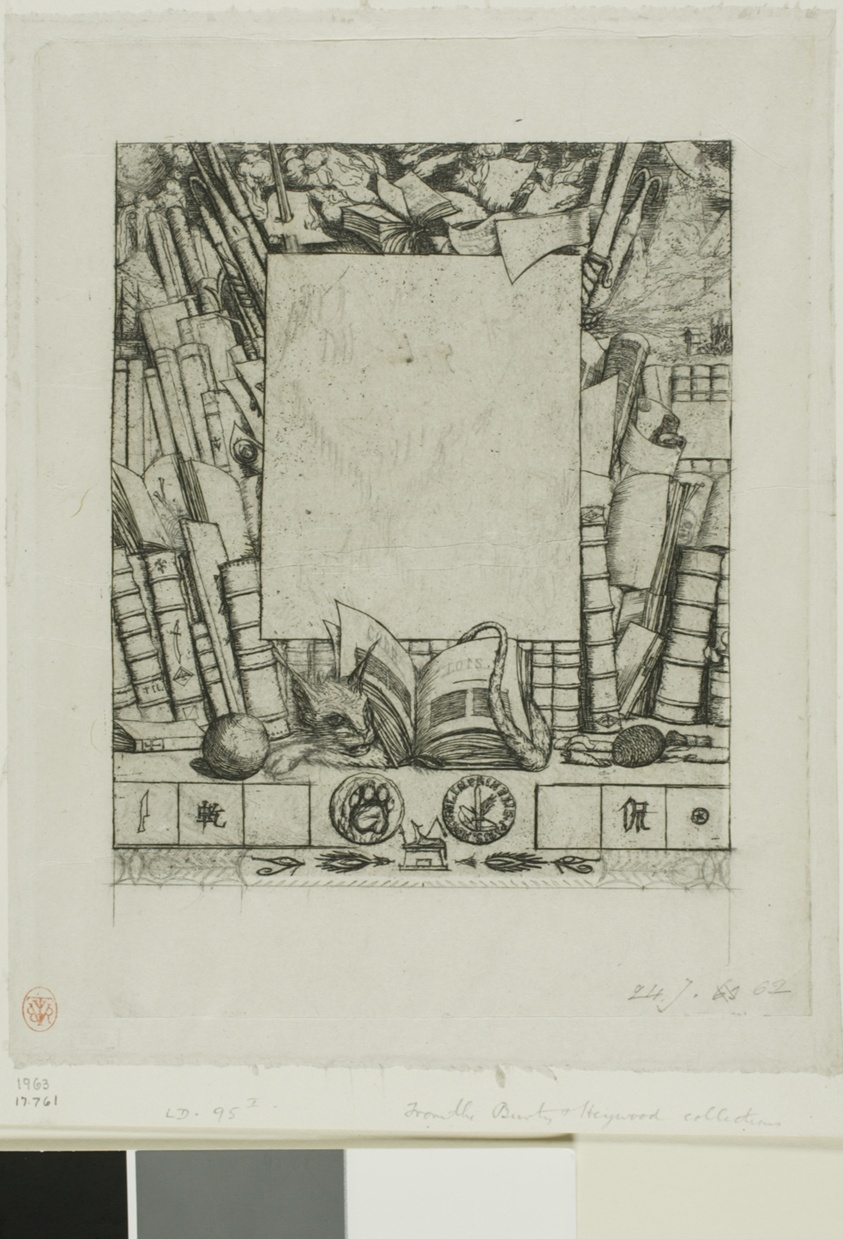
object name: Print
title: Design for a Frame for the Portrait of Armand Guéraud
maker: Charles Meryon (French, 1821-1868)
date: 1862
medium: Etching with burnishing, scraping, and foul biting, and graphite additions on grayish ivory chine, laid down on ivory board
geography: France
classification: etching; print; prints and drawing